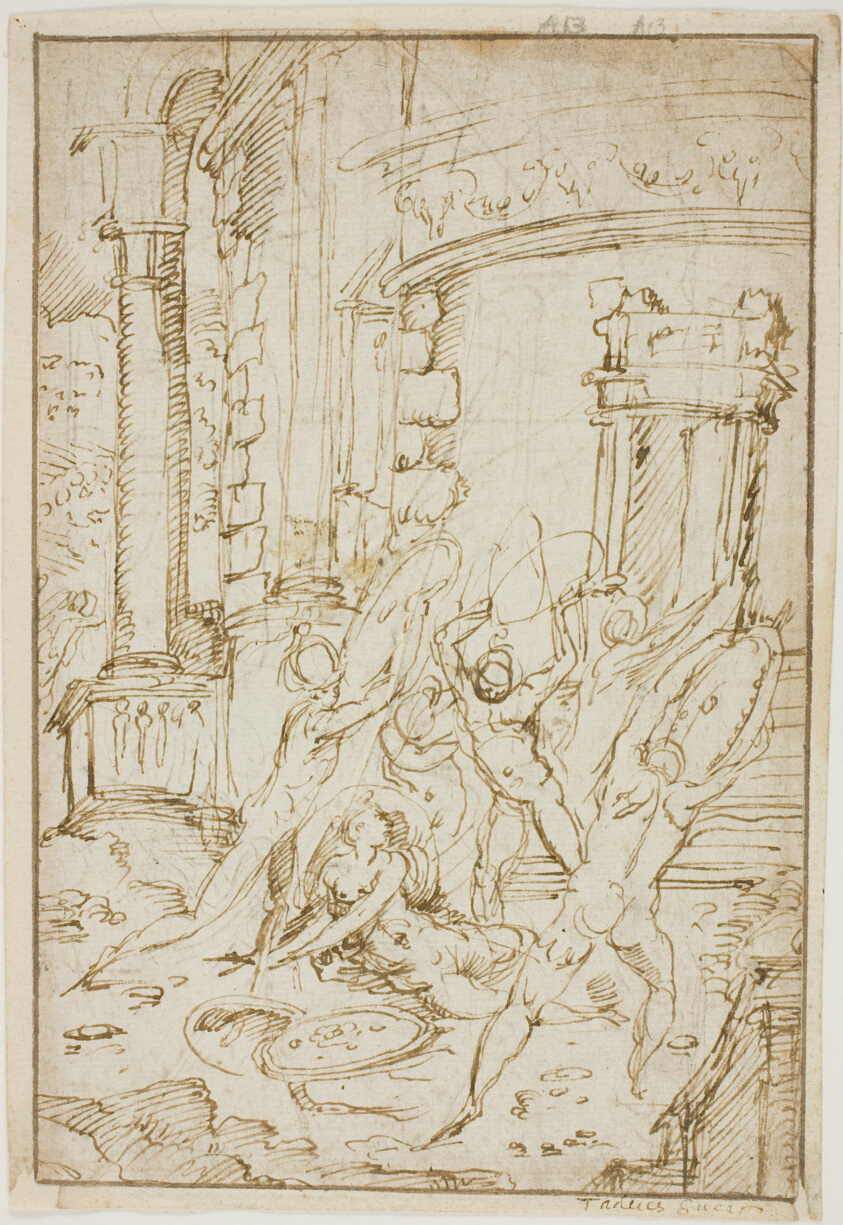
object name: Drawing and Watercolor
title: Study for the Rape of the Sabines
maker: Circle of Jacopo Zanguidi, called Bertoia; Italian, 1544-1573/74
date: 1564/74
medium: Pen and brown ink over traces of black chalk, on ivory laid paper, edge mounted to ivory laid paper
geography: Italy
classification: pen and ink drawings; drawings (visual works); prints and drawing